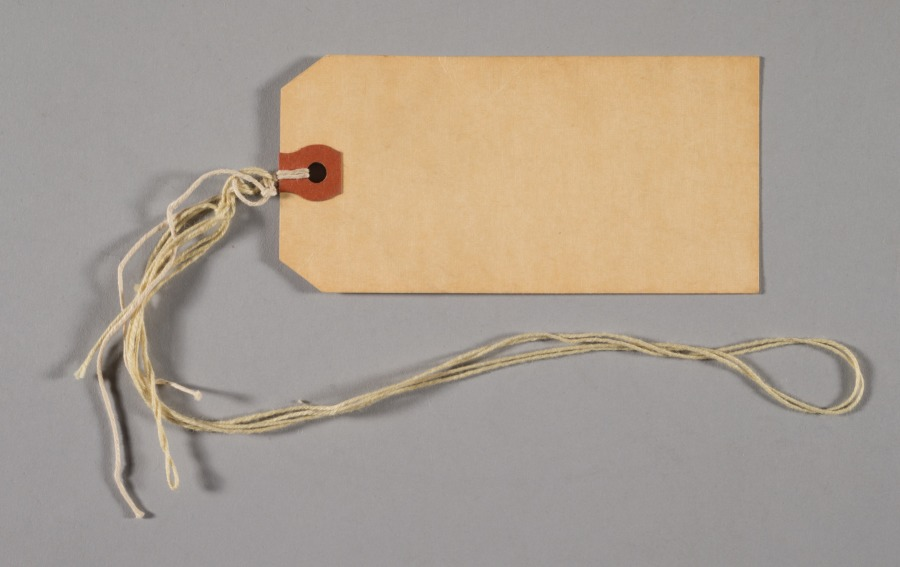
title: Sparrows on Blossoming Plum; A Sage with Tiger; Chinese Bird on Snow-Laden Branch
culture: Japan, Edo period (1615–1868)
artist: Kano Tan’yū (Japanese, 1602–1674)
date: 1661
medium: Triptych of hanging scrolls; ink and slight color on silk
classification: Painting